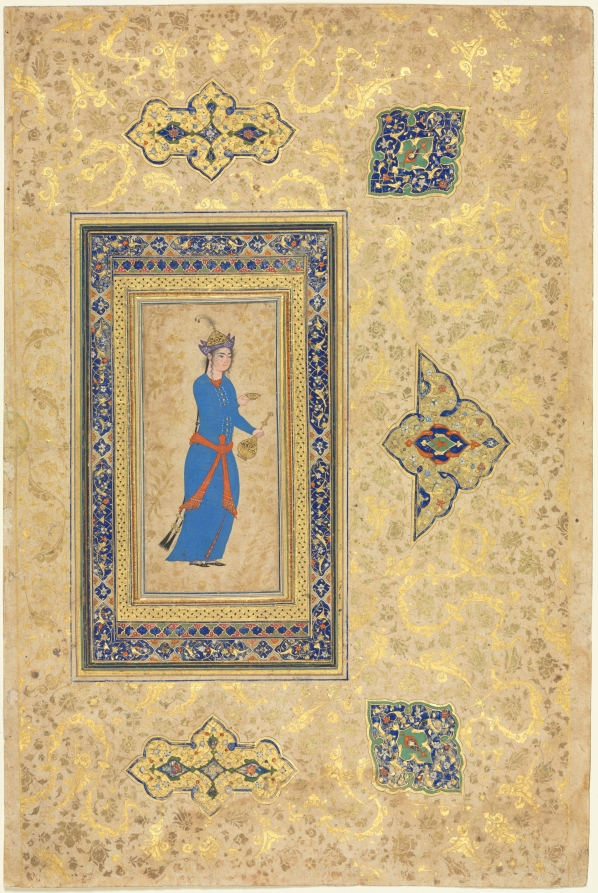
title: Princess with Wine Bottle and Cup (recto)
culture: Iran, Qazvin or Isfahan, Safavid period (1501-1722)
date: c. 1550–1600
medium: opaque watercolor and gold on paper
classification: Manuscript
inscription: Script: none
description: Single-page depictions of courtly figures became popular in Iran during the 1500s. The subject here conveys Safavid ideals of female beauty. Long dark hair falls in jeweled braids down to her ankles, while shorter tendrils frame her full, smooth face. She is shown in the three-quarter profile favored in Persian painting. The contrasting colors of the bright blue of her robe and the orange of her sash and tunic beneath are features of Safavid fashion.